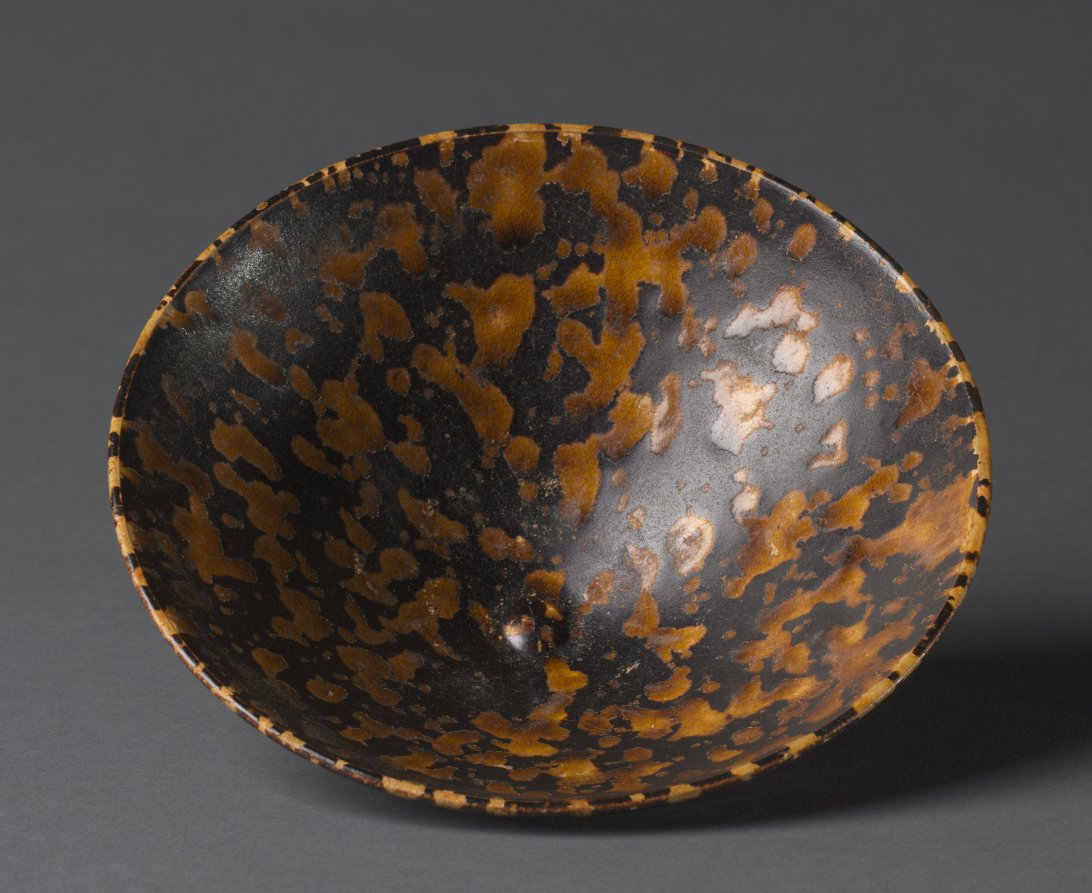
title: Conical Bowl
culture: China, Jiangxi Province, Ji'an, Southern Song dynasty (1127–1279)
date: 1100s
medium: stoneware with "tortoise shell" glaze, Jizhou ware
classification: Ceramic